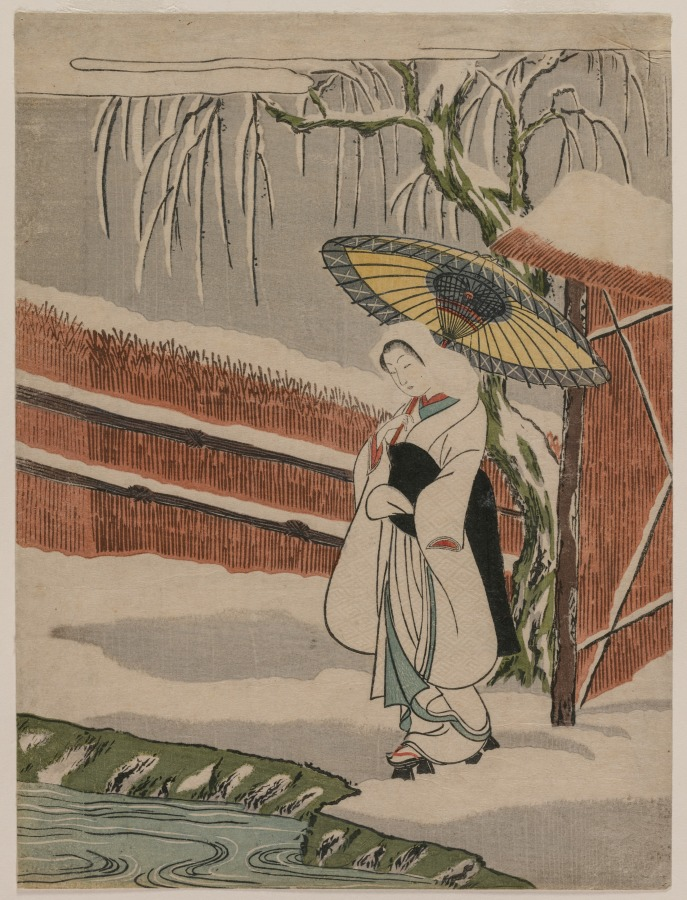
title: The Heron Maiden Standing Beneath a Willow Tree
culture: Japan, Meiji period (1868–1912)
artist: after Suzuki Harunobu (Japanese, 1724–1770)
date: 1868–1912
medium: color woodblock print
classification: Print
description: Suzuki Harunobu produced the original design for this print in about 1766 to 1767. The brighter colors of this print, and in particular the unfaded color of the water indicates that it is of a later date.